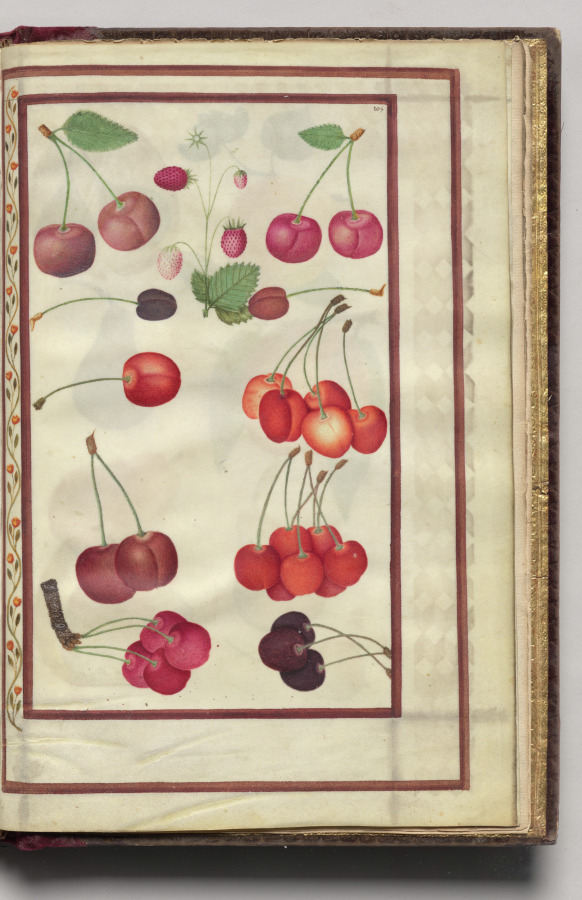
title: Cherries and Strawberries, folio 47 (recto), from Florilegium (A Book of Flower Studies)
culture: France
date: 1608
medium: watercolor, ink, silver, and gold over occasional traces of pencil, on vellum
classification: Bound Volume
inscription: Dated: Poitiers 1608 (on frontispiece) Signed: On frontispiece in black ink, lower right: Van Kuyk Notation on drawing: Frontispiece: in pencil, lower margin: * élève de Van Kessel, peintre flammand (* in pencil also appears in front of Van Kuyk's name).